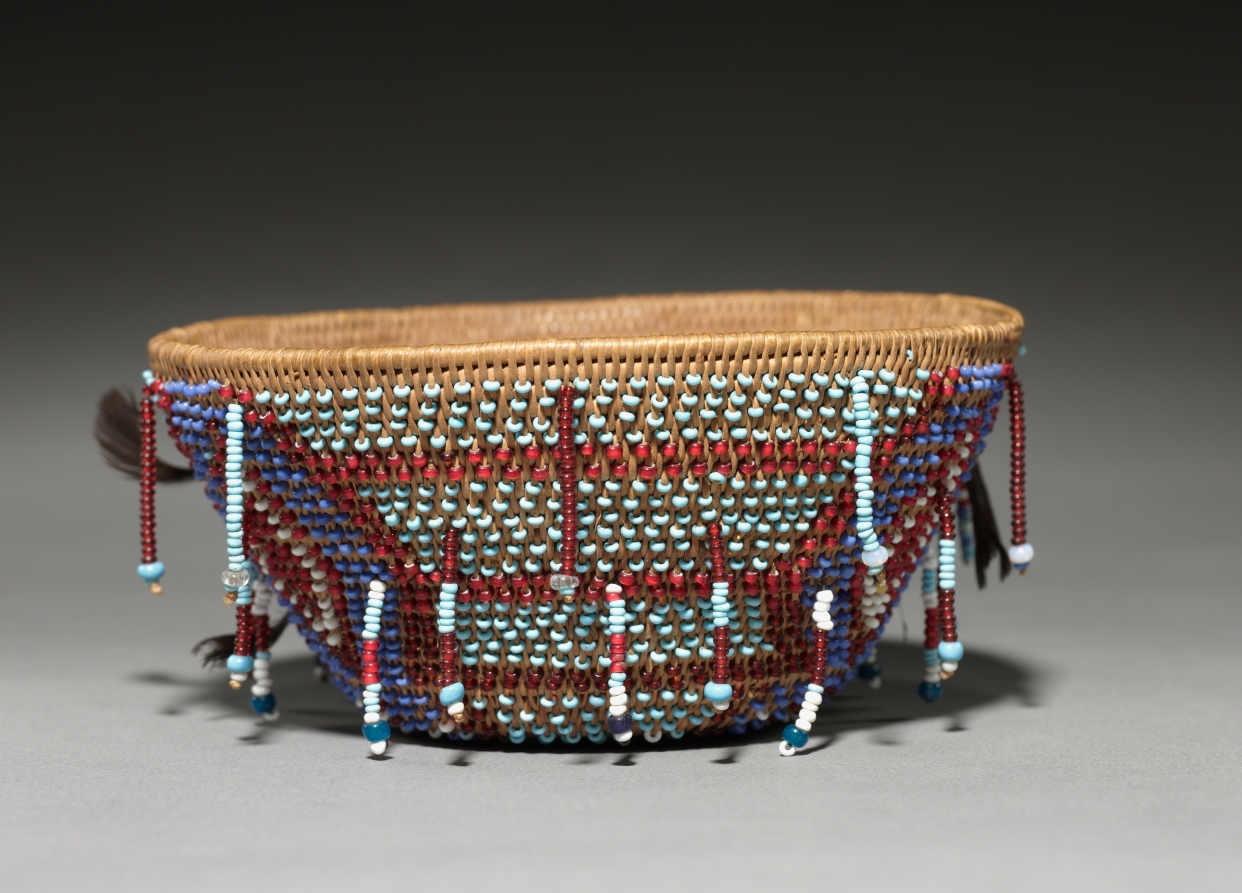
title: Conical Beaded Basket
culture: California, Wappo, Alexander Valley, Late 19th- Early 20th century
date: c. 1875–1925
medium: glass beads and feather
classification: Basketry